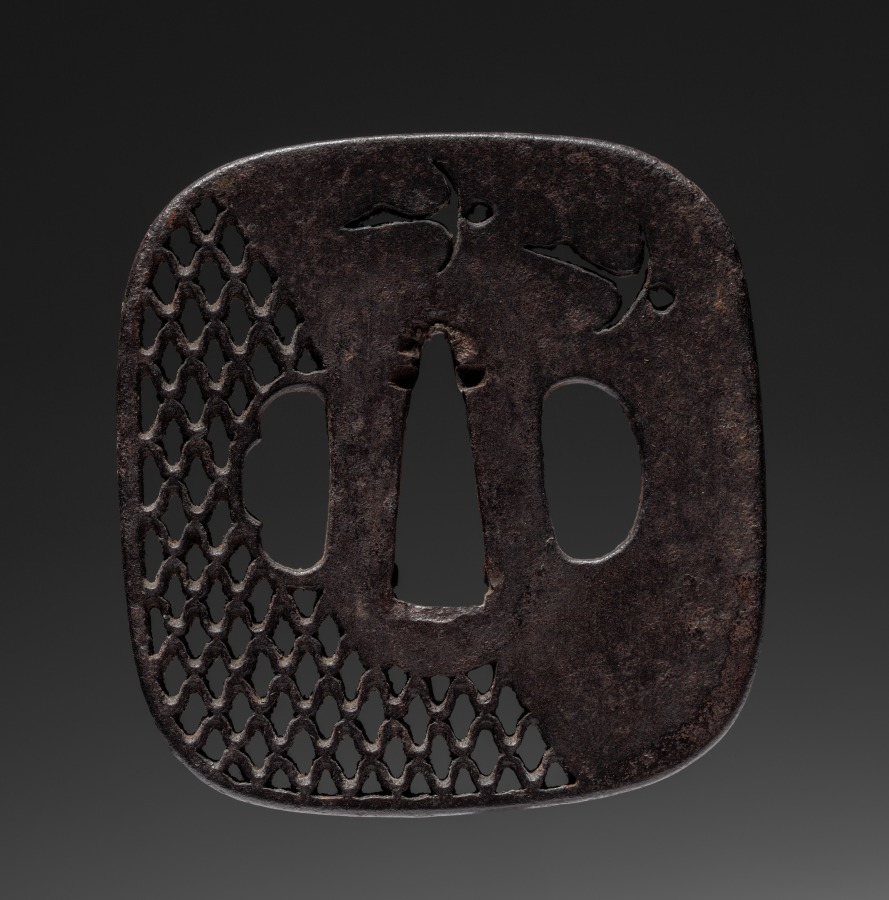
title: Sword Guard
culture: Japan, Edo period (1615–1868)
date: 1615–1868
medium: iron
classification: Arms and Armor